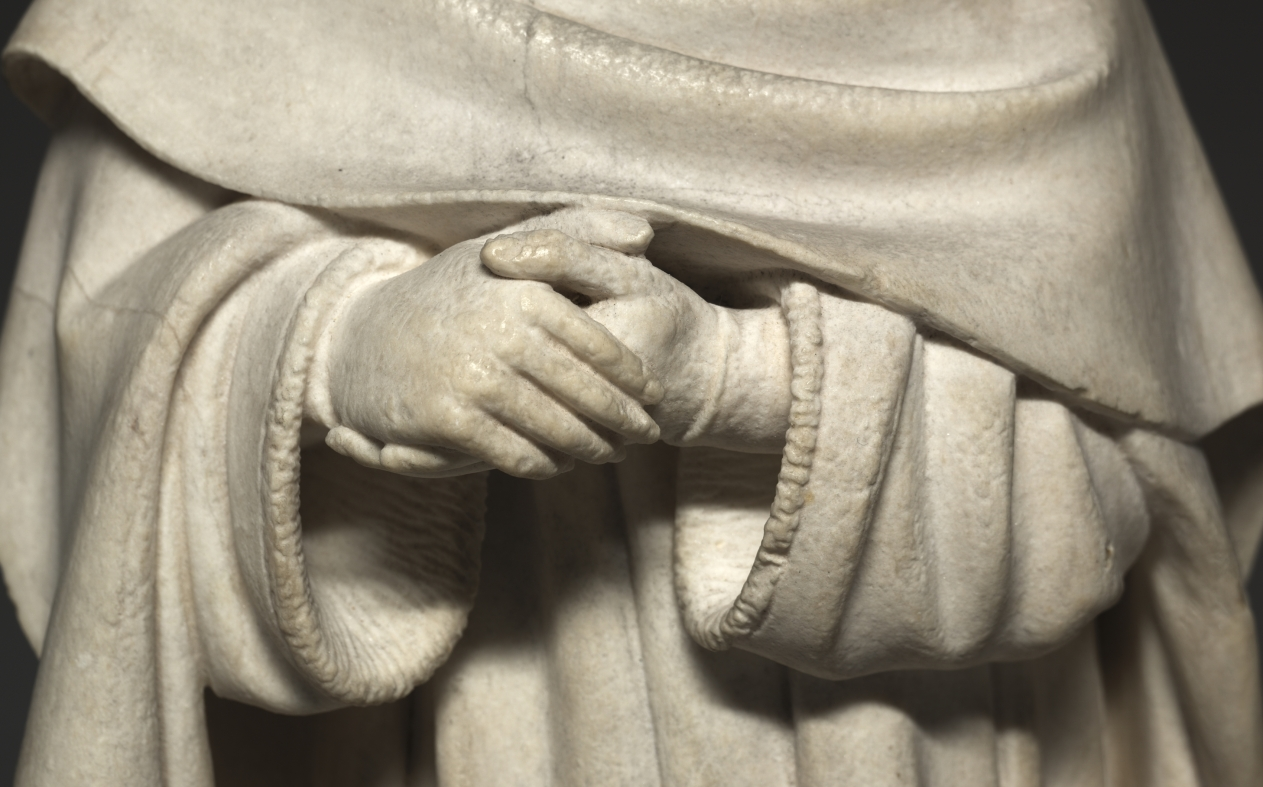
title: Mourner from the Tomb of Philip the Bold, Duke of Burgundy (1364–1404)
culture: Netherlands, active Dijon, 15th century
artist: Claus de Werve (Netherlandish, 1380–1439)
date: 1404–10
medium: vizille alabaster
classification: Sculpture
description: This figure comes from the tomb of Duke Philip the Bold from the church of Champmol near Dijon (Burgundy, France). Philip, who founded the monastery and designated it as his burial place, hired the best artists, many of whom came from the Netherlands. While the commission was given in 1381, the work was not completed until 1410, six years after the duke’s death. This mourner is unusual for the time because it is not carved as a static low relief on the pedestal of the tomb but interact with the viewers and their fellow procession members. The lifelike quality of the figure is due in large part to the alabaster. Its softness allowed artists to carve details into the material, and the transparent, milky white stone could also be polished to a high gloss.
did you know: The use of alabaster in the late Middle Ages began in the 1300s with court art in the circles of French kings, especially in the field of funerary sculpture.